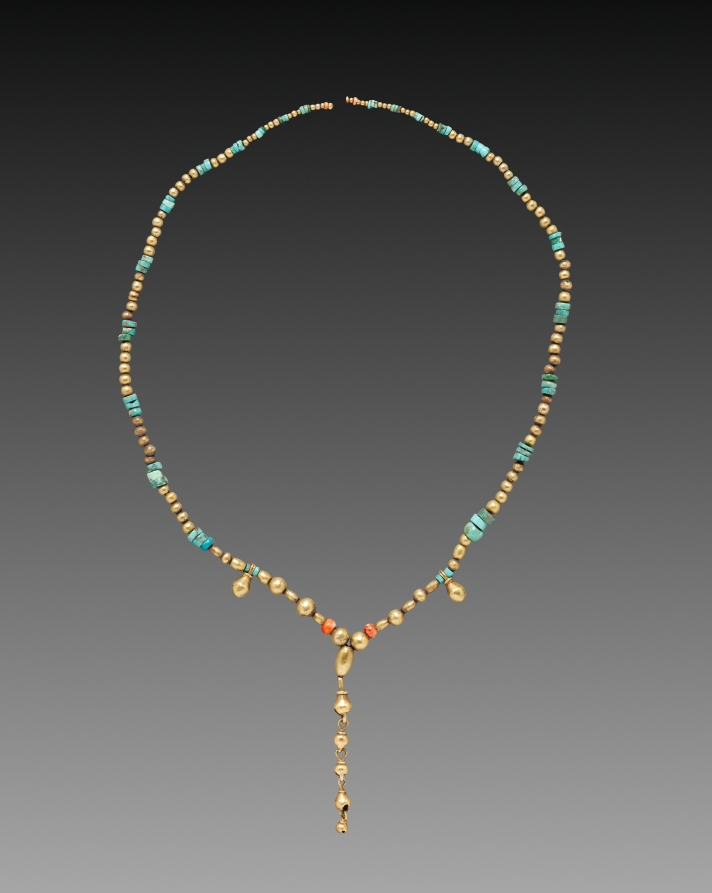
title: Necklace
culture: Mexico, Oaxaca, Mixtec, 13th-16th century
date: c. 1200–1519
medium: gold, shell, turquoise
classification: Jewelry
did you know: These ancient beads were restrung in modern times.